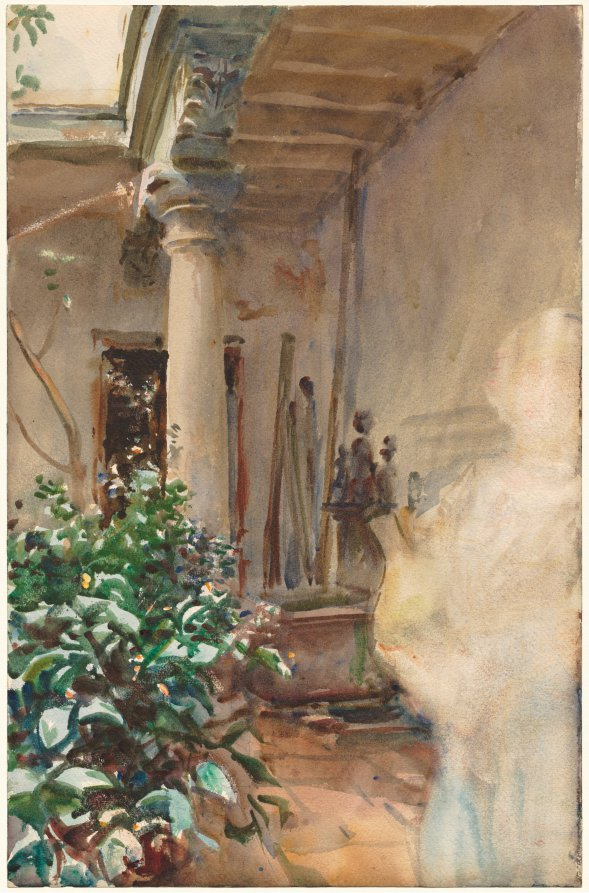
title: The Patio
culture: America, late 19th-early 20th Century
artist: John Singer Sargent (American, born Italy, 1856–1925)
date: 1908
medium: watercolor with traces of gouache over graphite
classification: Drawing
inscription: VERSO, center, in orange crayon: 5/3 ; lower left, in black chalk: 4072 [circled, sideways]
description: Sargent was born in Italy, studied in France, and worked chiefly in England, but he never renounced his American citizenship. As a young man, Sargent achieved fame and wealth as a portraitist, but he gradually tired of painting wealthy, superficial aristocrats. In his later years he focused increasingly on watercolor. Along with Winslow Homer, Sargent was the major artist to develop a spontaneous approach toward watercolor. Rather than carefully layering his pigments, he dashed off his paintings in a single sitting, allowing the colors to freely blend together.